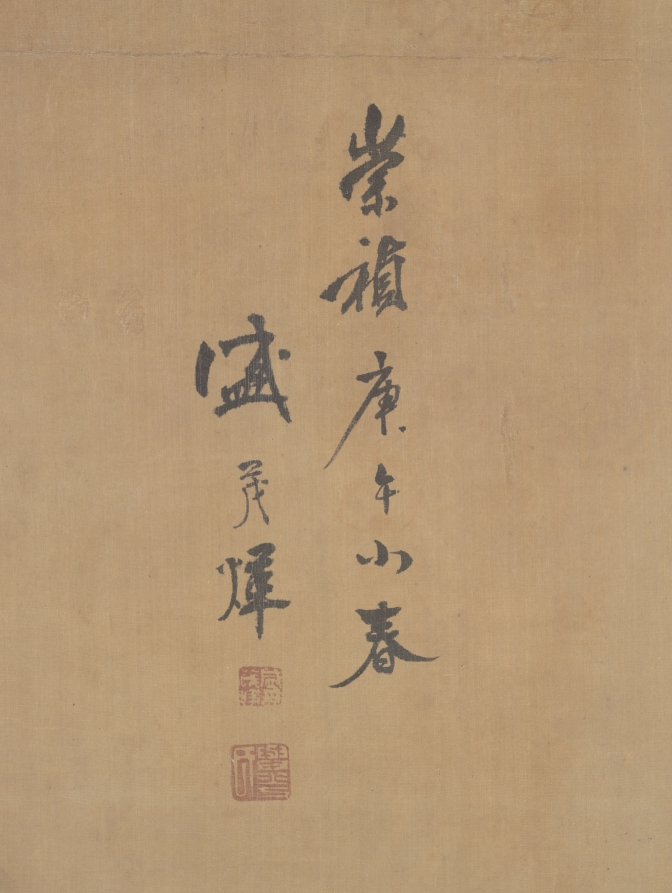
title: Lonely Retreat Overlooking a Misty Valley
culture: China, Ming dynasty (1368–1644)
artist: Sheng Maoye (Chinese, active early 1600s)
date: 1630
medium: hanging scroll; ink and slight color on silk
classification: Painting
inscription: Artist's inscription, signature, and 2 seals: In the tenth month of the gengwu year of the Chongzhen era [1630]. Sheng Maoye [seals] Sheng yin Maoye; Yuhua shi.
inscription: 4 additional seals of Liu Shu (1759–1816)